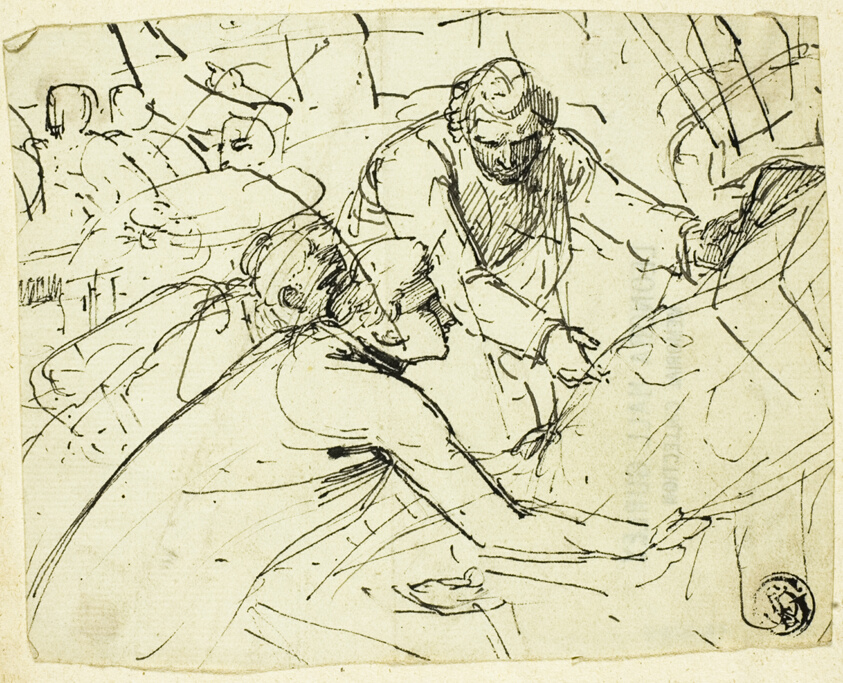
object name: Drawing and Watercolor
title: The Death of General Wolfe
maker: Attributed to Benjamin West; American, 1738-1820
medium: Pen and black ink on ivory laid paper, tipped onto ivory wove paper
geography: United States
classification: pen and ink drawings; drawings (visual works); prints and drawing